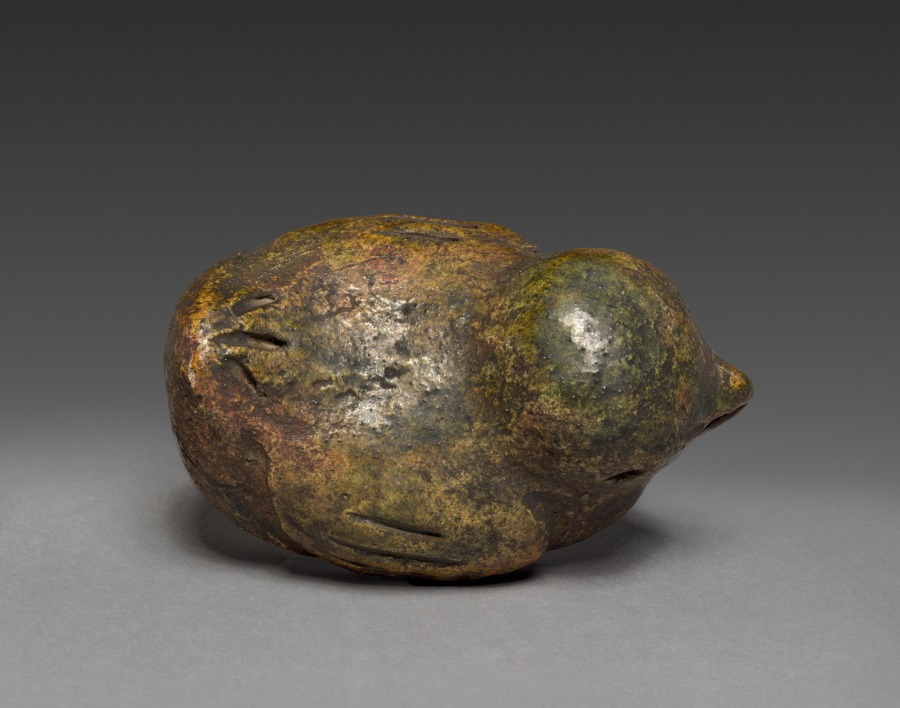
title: Lid of Incense Container (Kōgō) in the Shape of a Bird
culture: Japan, Edo period (1615–1868)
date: c. 1700–1868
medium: pottery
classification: Ceramic